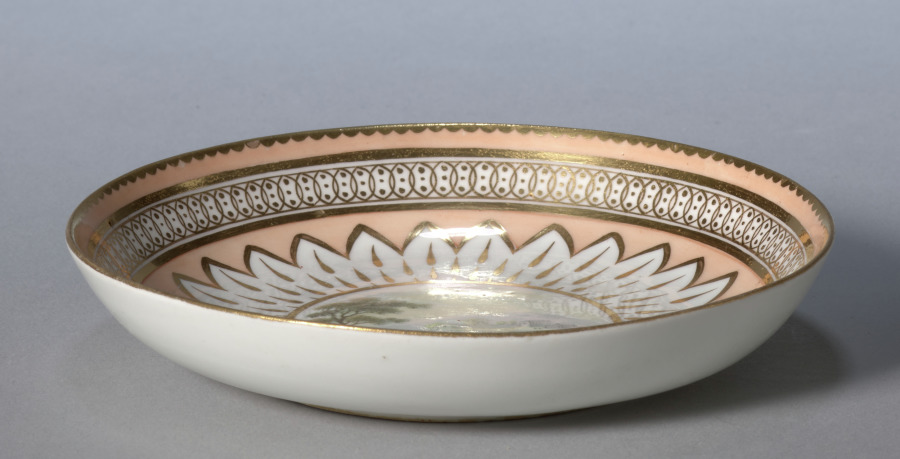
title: Saucer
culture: England, Derby, early 19th century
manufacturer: Derby (Crown Derby Period) (British)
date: c. 1800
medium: porcelain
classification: Ceramic